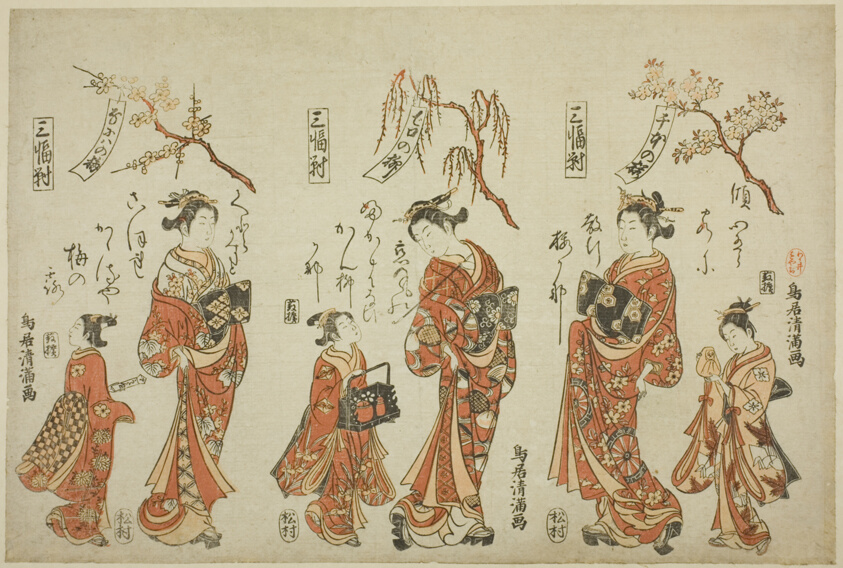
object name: Print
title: A Triptych (Sanpukutsui): Courtesans of the Pleasure Quarters of the Three Cities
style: Japanese (culture or style)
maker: Torii Kiyomitsu I (Japanese, 1735-1785)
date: second half of 18th century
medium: Color woodblock print; uncut hosoban triptych, benizuri-e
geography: Japan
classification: woodblock print; print; asian art